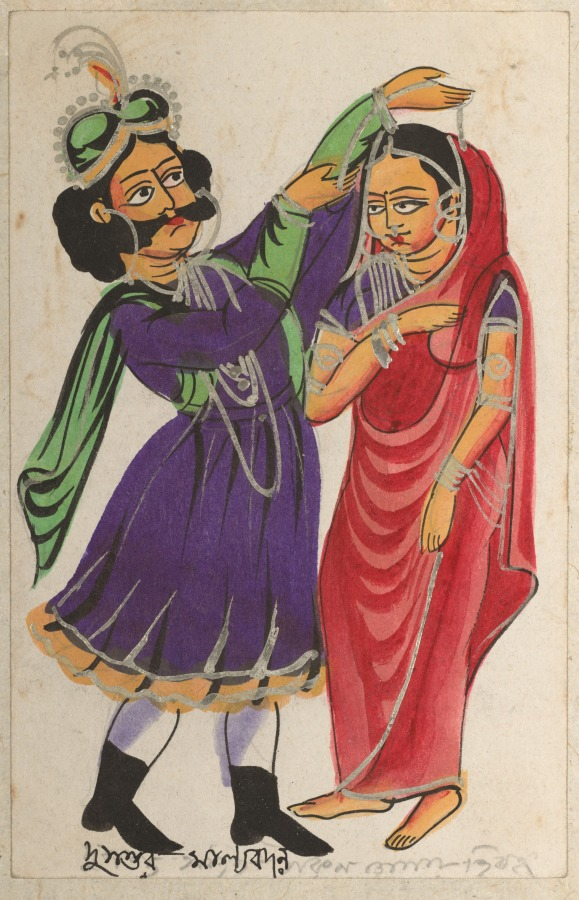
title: Dusmanta Garlanding Shakumtala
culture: Eastern India, Bengal, Kolkata, Kalighat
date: c. 1890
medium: Gum tempera, graphite, ink, and tin on paper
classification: Painting